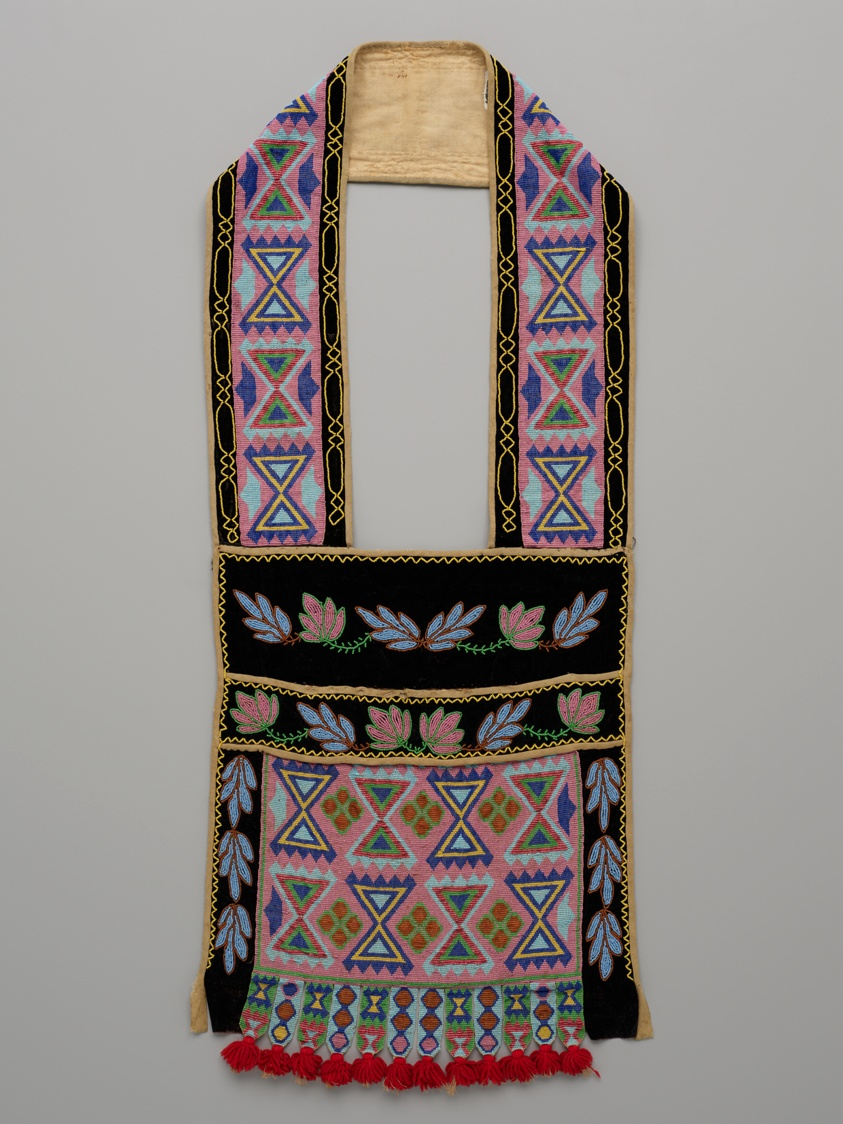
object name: Costume and Accessories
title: Man's Shoulder Bag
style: potawatomi, native american, americas, Arts of the Americas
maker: Maker unknown (Potawatomi); Great Lakes region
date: Mid–late 19th century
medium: Cotton, velvet, yarn, and glass seed beads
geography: Great Lakes Region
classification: beadwork; costume accessory; costume; art of the americas